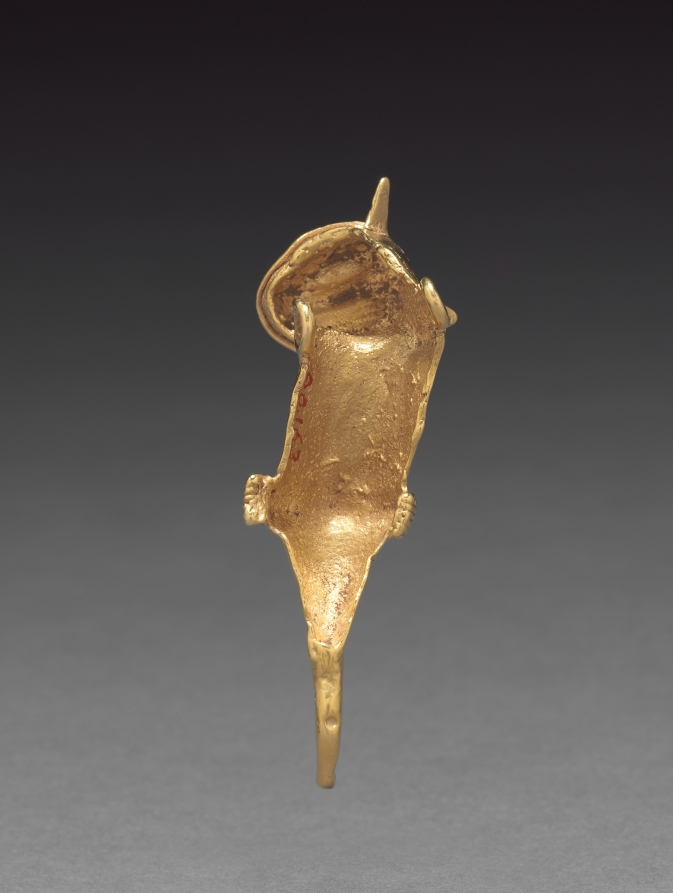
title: Jaguar Pendant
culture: Panama, Veraguas style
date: 800–1500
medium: cast gold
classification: Metalwork